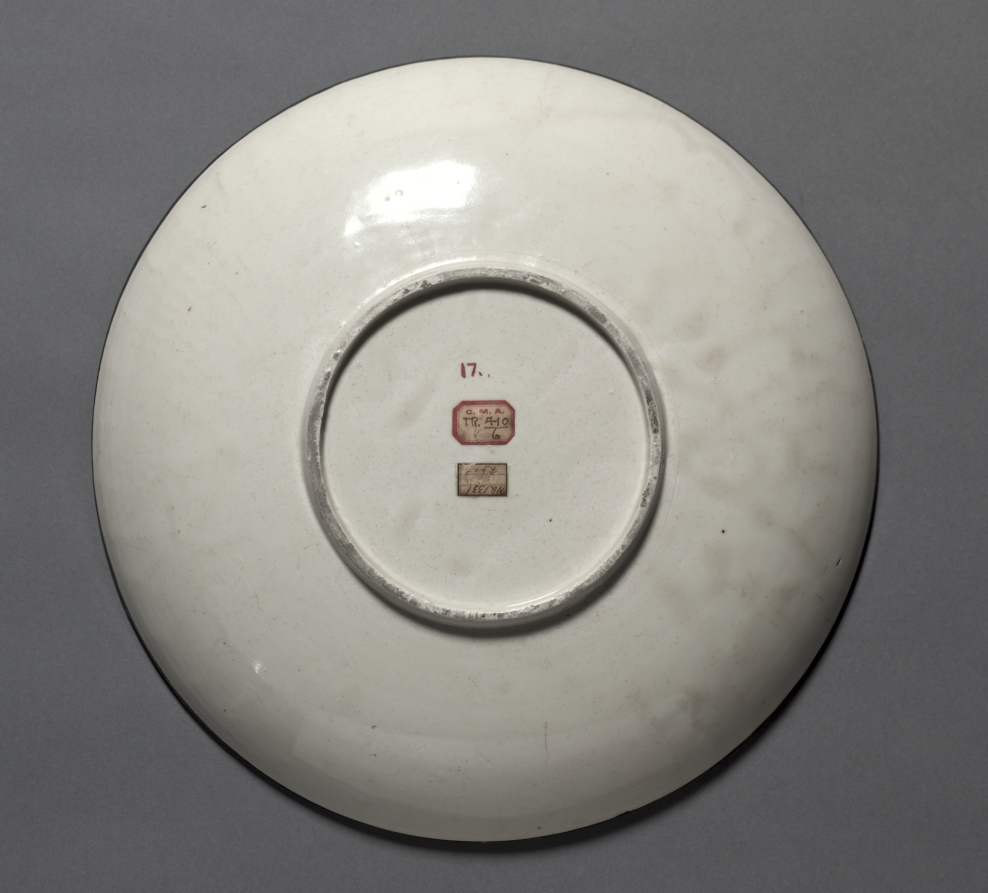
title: Dish: Ding ware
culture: China, Hebei province, Jin dynasty (1115-1234)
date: 1100s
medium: glazed grayish-white porcelain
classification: Ceramic